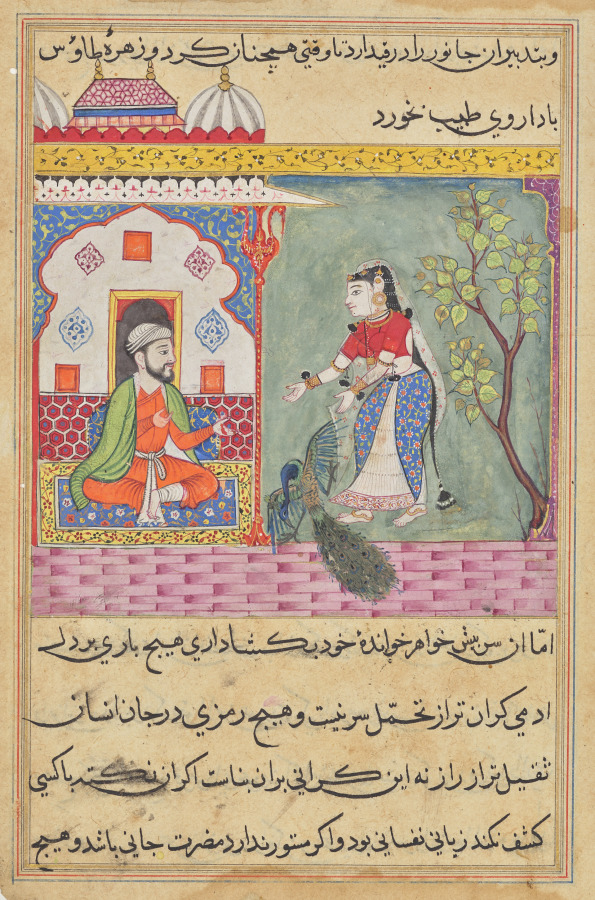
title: The Brahman’s wife who killed a peacock and ate its gallbladder on the physician’s advice, from a Tuti-nama (Tales of a Parrot): Nineteenth Night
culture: Mughal India, court of Akbar (reigned 1556–1605)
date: c. 1560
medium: gum tempera, ink, and gold on paper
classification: Painting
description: The Brahman’s wife stands over the body of the Raja’s dead peacock, which she killed in hopes of finding a cure for her infertility. The woman’s crime was nearly discovered, but she ultimately saved herself with a cunning lie. The physician, wearing orange and green, sits in the chamber on the left.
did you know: The gold square on the long black cord around the woman’s neck is an amulet.